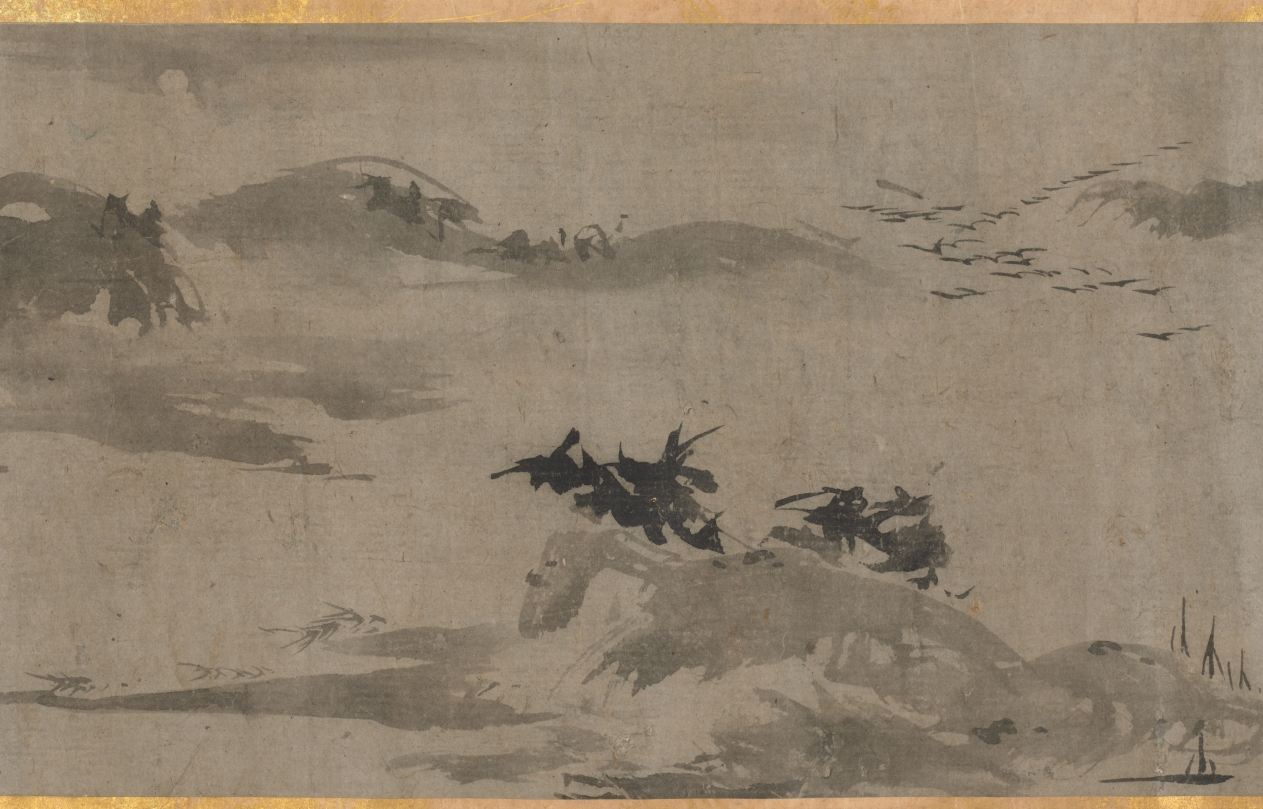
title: Eight Views of Xiao-Xiang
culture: Japan, Muromachi period (1392–1573)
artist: Sesson Shūkei (Japanese, c. 1492–c. 1577)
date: 1500s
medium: handscroll; ink on paper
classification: Painting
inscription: Signature and seal of artist at end of painting.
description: Eight Views of the Xiao and Xiang Rivers can be traced to 11th-century Chinese poems and paintings, the depiction of which had also become popular among Korean and Japanese painters. Xiao-Xiang refers to the region in present-day Hunan province where the Xiao and Xiang rivers converge. Few painters of the Eight Views had in fact seen the scenery; rather, they were trying to portray in ink and wash the lyrical qualities of dim light and a misty atmosphere typical of that region. Each of the poetic titles suggests a time of day, a season, or specific atmospheric conditions—subjects that challenged the abilities of the most talented artists. In this miniature painting (shukuzu) of the Muromachi period, Japanese Zen monk and painter Shukei Sesson depicted all eight views featured in Chinese prototypes: Wild Geese Descending to Sandbar; Returning Sails Off a Distant Coast; Mountain Market in Clearing Mist; River and Sky in Evening Snow; Autumn Moon over Dongting Lake; Night Rain on the Xiao and Xiang; Evening Bell from Mist-Shrouded Temple; and Fishing Village in Evening Glow.